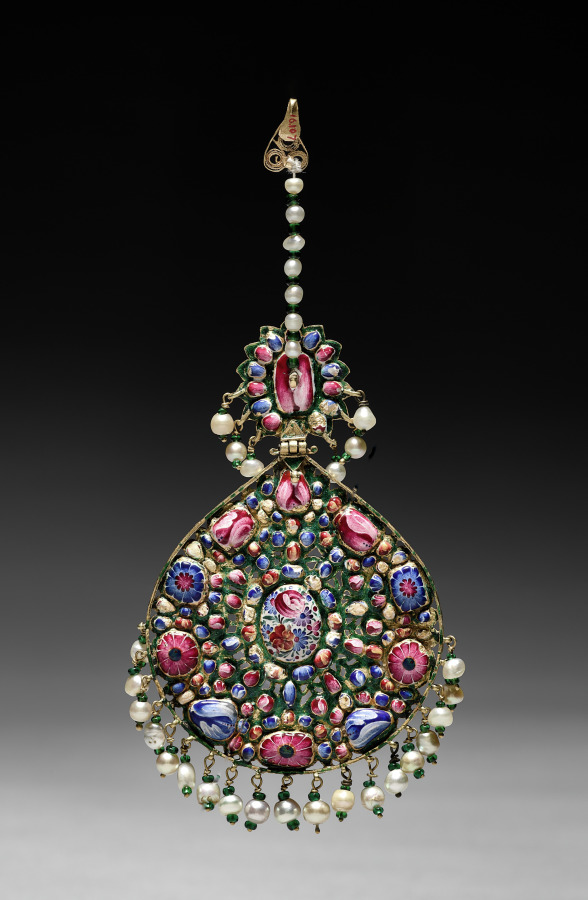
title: Pendant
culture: India, Bengal (?)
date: 1800s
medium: gold with emeralds and rubies, enamel and pearl pendants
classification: Jewelry